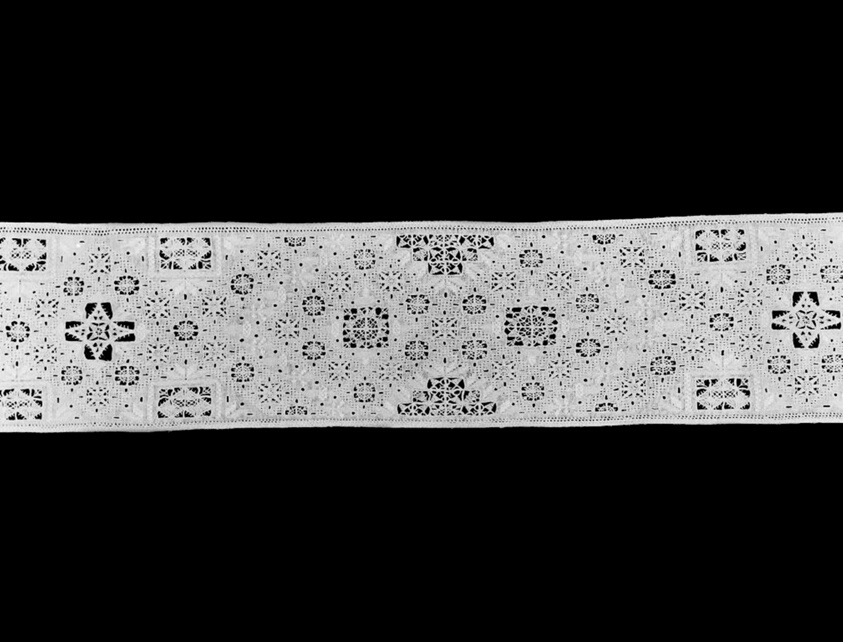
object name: Textile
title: Insertion (For a Cover)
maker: Belgium, Possibly Flanders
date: 1550/1600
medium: Linen, needle lace worked on plain weave; cut and drawn thread grid; embroidered in chained border, double hem, eyelet, and stem stitches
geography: Flanders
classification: textile; lace - needle